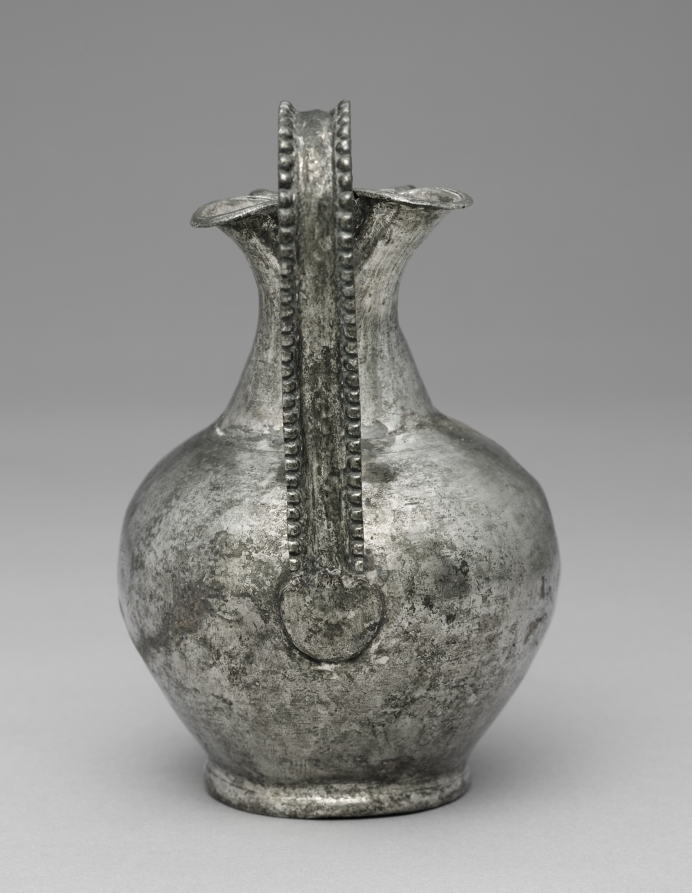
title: Ewer with a Trefoil (Three-Part) Spout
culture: Byzantium, Syria(?), Byzantine period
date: 300–600 CE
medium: silver with niello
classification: Metalwork